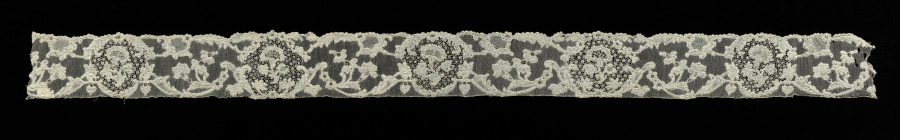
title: Lace Edging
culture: France, Alençon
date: 1700s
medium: Linen: needle lace (Point d'Alençon)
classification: Lace